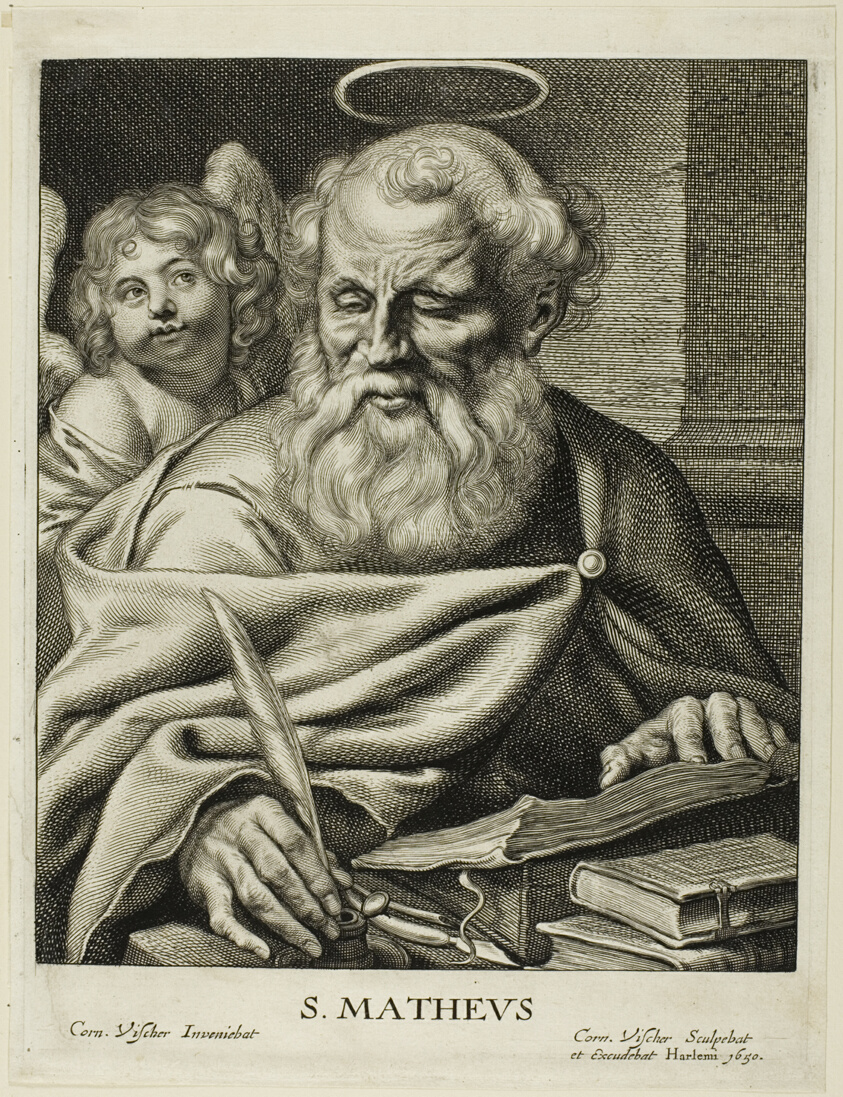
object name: Print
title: Saint Matthew, from The Four Evangelists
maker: Cornelis Visscher (Dutch, c. 1629-1658)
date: 1650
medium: Engraving on ivory paper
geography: Holland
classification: engraving; print; prints and drawing